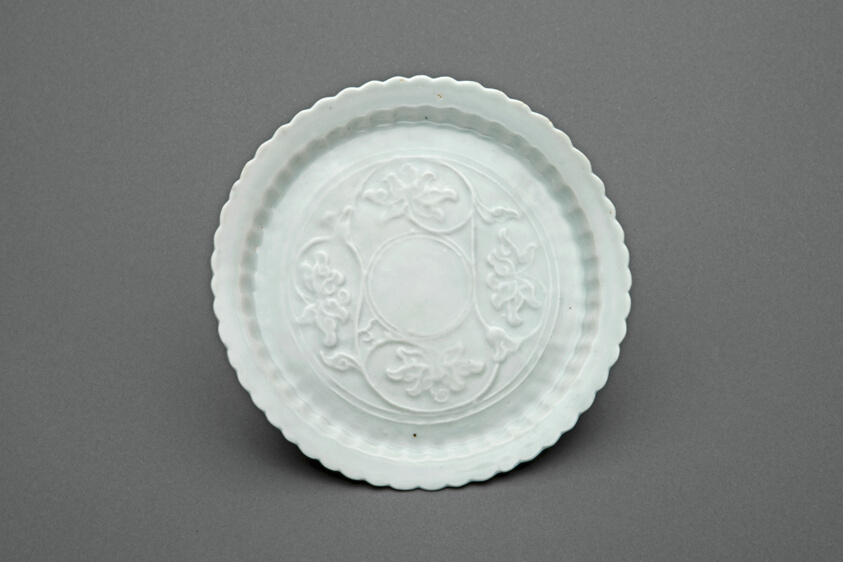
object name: Vessel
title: Lobed Dish with Lotus Scrolls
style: Chinese (culture or style)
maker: China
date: Yuan dynasty (1271–1368), first half of the 14th century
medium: Luanbai (eggshell white) ware; porcelain with underglaze molded decoration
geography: China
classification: dish (vessel); vessel